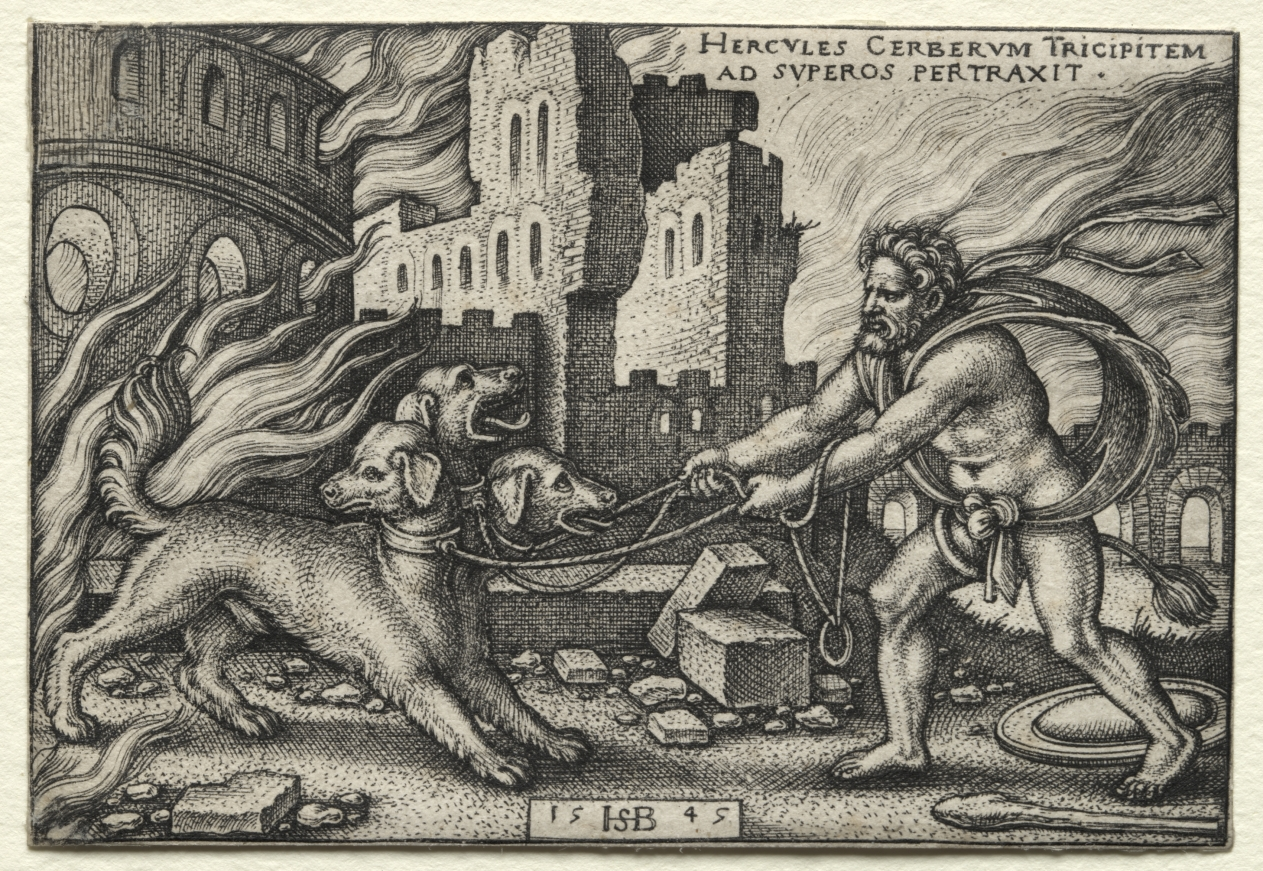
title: The Labors of Hercules: Hercules Dragging Cerberus from the Underworld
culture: Germany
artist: Hans Sebald Beham (German, 1500–1550)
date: 1545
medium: engraving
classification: Print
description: Beham was one of several German printmakers referred to today as the “Little Masters.” They established their artistic prowess by engraving remarkably small prints, appealing to collectors fascinated with miniature objects and curiosities. Here, Beham has packed 12 larger-than-life stories of the mighty Hercules into tiny prints. The series includes three of the 12 labors Hercules performed as penance for slaying his children in a fit of madness: Strangling the Nemean Lion, Killing the Lernean Hydra, and Dragging Cerberus from the Underworld. The other scenes depict tales from his life and the events preceding his death. The son of Jupiter and the mortal Alcmena, Hercules was both man and god. His saga of moral and physical trials made him one of the most popular classical heroes in Renaissance art.